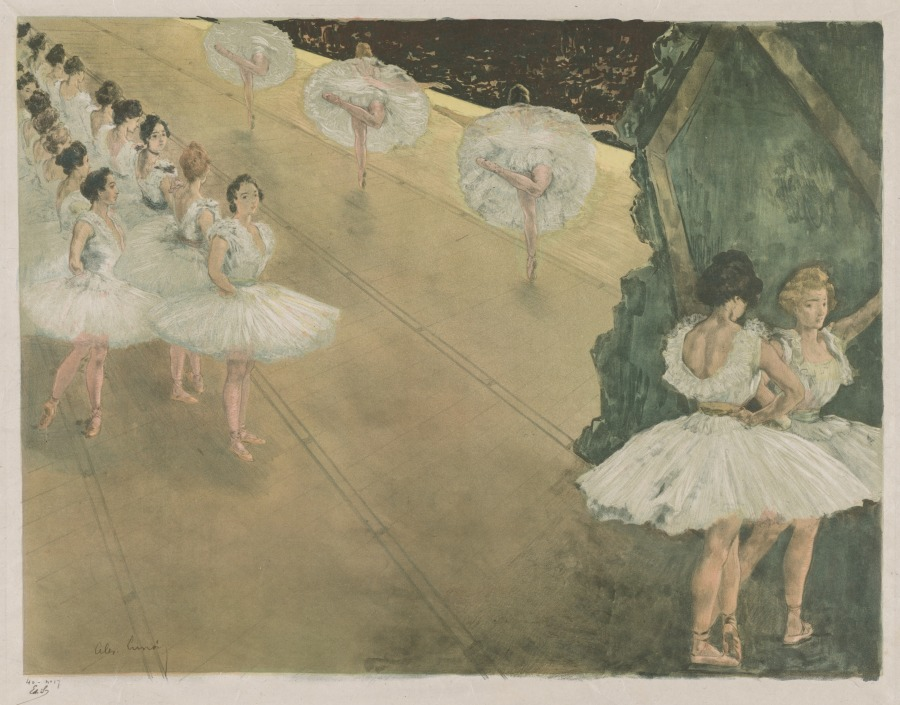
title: Ballet Dancers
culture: France, 19th century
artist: Alexandre Lunois (French, 1863–1916)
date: late 1800s–early 1900s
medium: lithograph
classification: Print